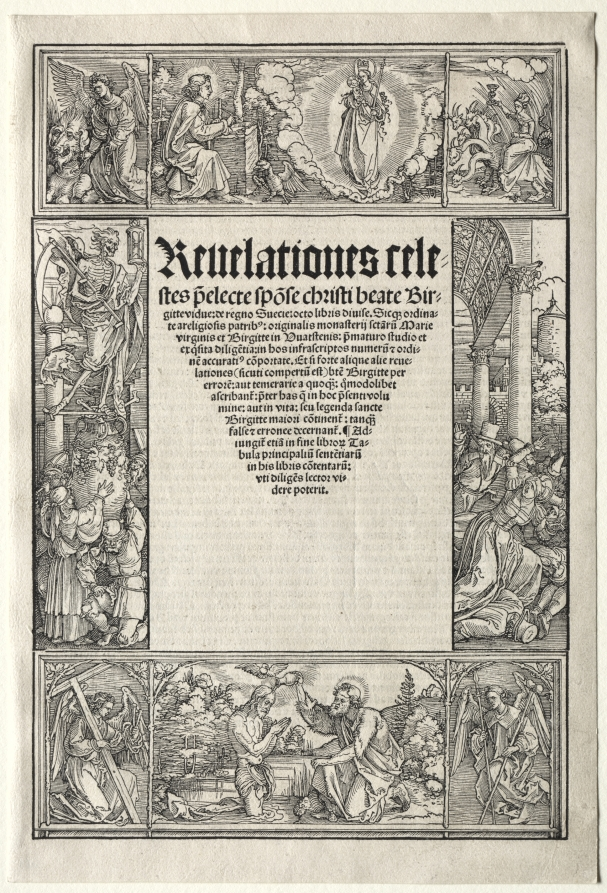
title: Border - with The Baptism of Christ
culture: Germany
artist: school of Albrecht Dürer (German, 1471–1528)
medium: woodcut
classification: Print